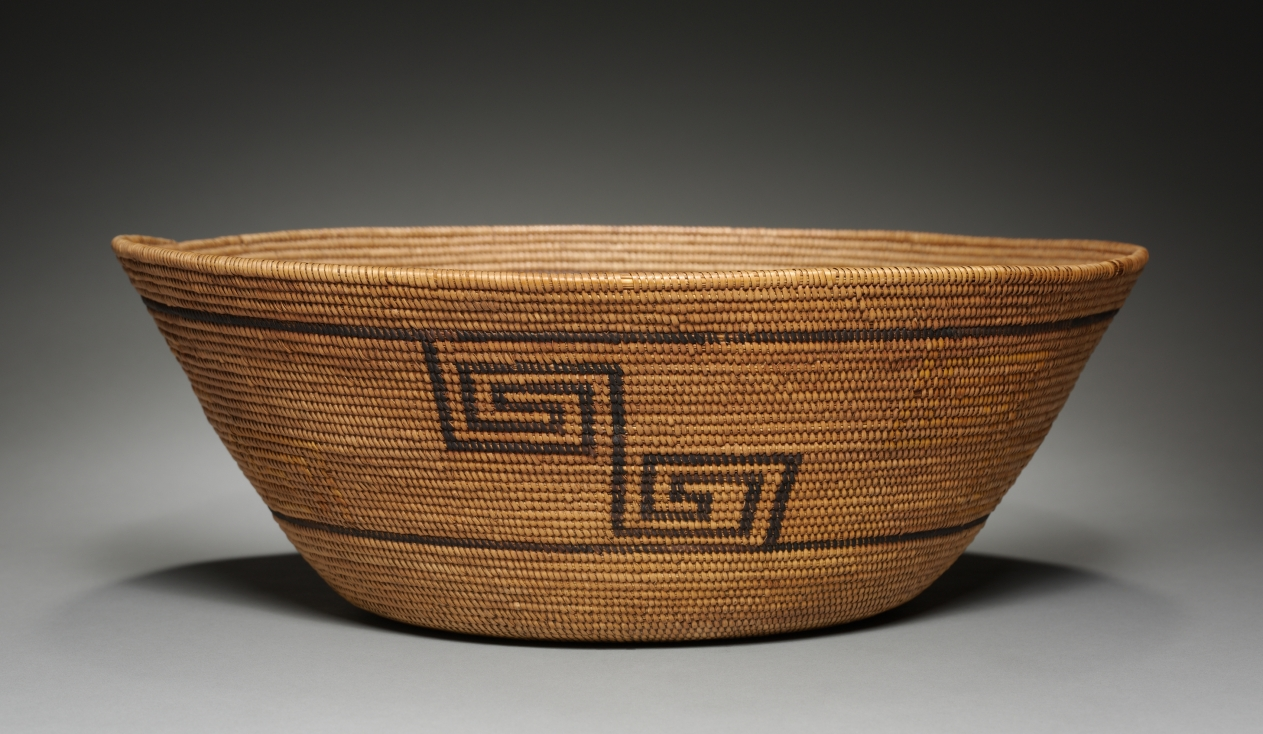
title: Food Bowl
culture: California, Mission, Late 19th- Early 20th century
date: c 1875– 1924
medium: coiled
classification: Basketry